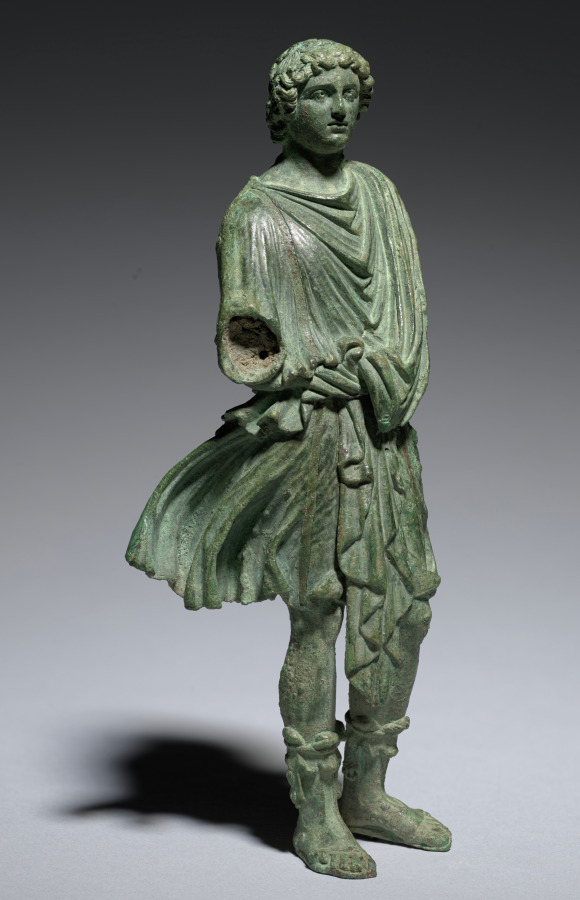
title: Lar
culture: Italy, Rome, Early Imperial period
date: 1–25 CE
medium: bronze with copper inlays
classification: Sculpture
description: This youthful bronze figure wears a short tunic with copper inlaid stripes and open-toed boots with animal-skin liners. The figure’s arms are missing, but based on other surviving examples, they likely held a libation dish and cornucopia. Even without these attributes, the figure can be identified through dress and stance as a type of Lar, or domestic deity, known as the Lar Familiaris (Household Lar), standing in a characteristic "quiet pose." Other types of Lares include the Lares Compitales and Lares Augusti (Lares of crossroads and of Augustus, respectively).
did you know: This statuette likely stood with other small bronzes in a household shrine called a lararium.